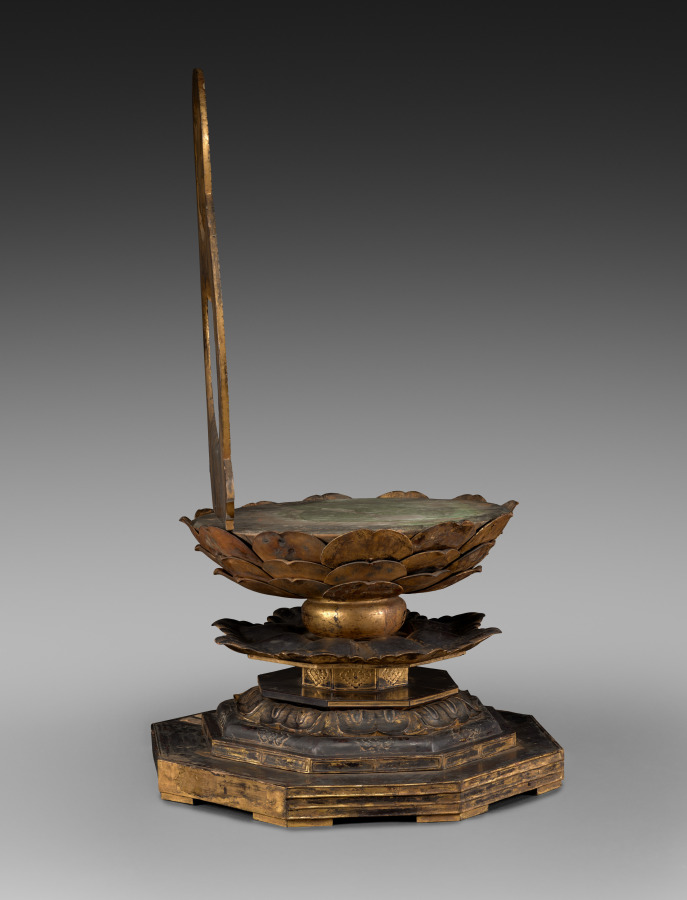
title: Seated Buddha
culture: Japan, Heian period (794–1185)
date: 1100s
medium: gilded wood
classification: Sculpture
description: Composed of a number of hollowed-out pieces of wood that were then covered with lacquer and gilding, this sculpture served as an image of worship in one of the small temples surrounding Kōfukuji, a major Buddhist temple in Nara, Japan. Like many Buddhas, this figure has its right hand positioned in a gesture meaning "fear not." The left hand is a replacement, so its original gesture, a clue to this Buddha's identity, is unknown. However, as the left foot is exposed over the garment, in lotus position, it may have been created as a Medicine Master Buddha, Yakushi Nyorai in Japanese, or the Buddha of our era, Shakyamuni.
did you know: A 1906 photo taken at Kōfukuji shows this sculpture without a halo or left hand.